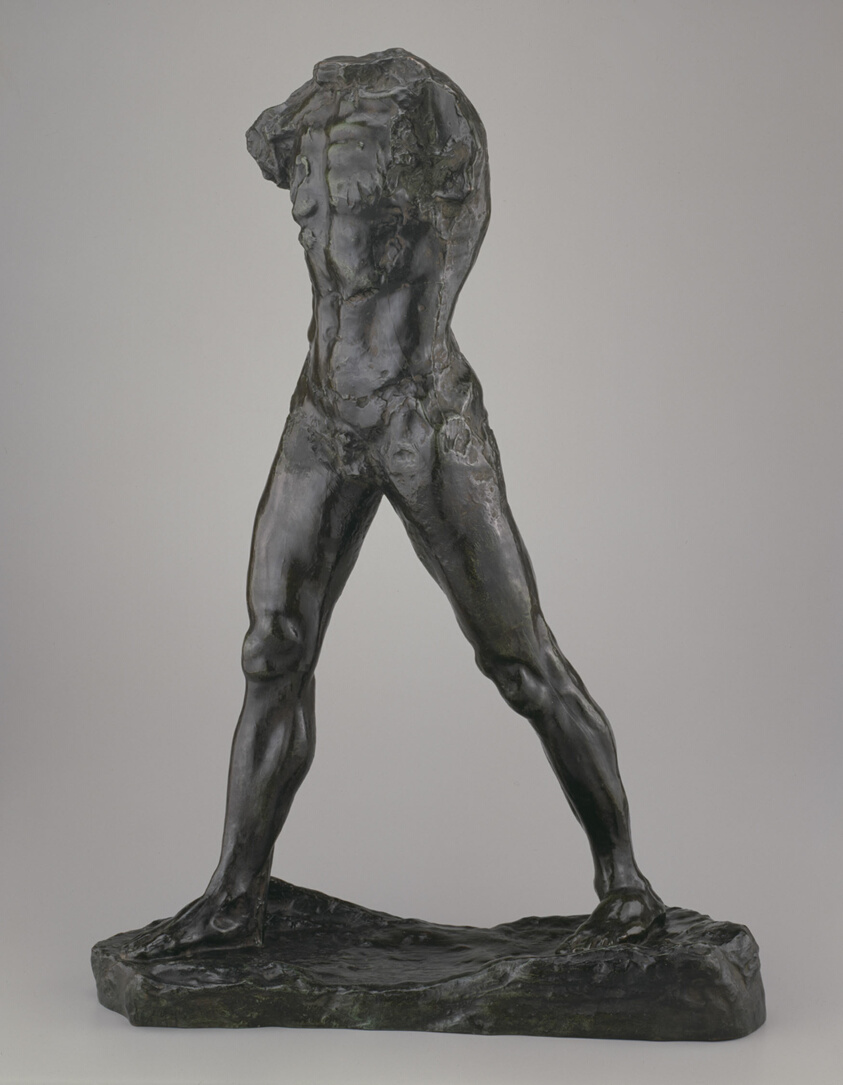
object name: Sculpture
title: The Walking Man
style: Post-Impressionism, 19th century, 20th Century, nineteenth century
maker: Auguste Rodin (French, 1840–1917)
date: Modeled 1877–1900, cast before 1917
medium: Bronze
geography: France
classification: statuette; sculpture; figure; french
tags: men, portraits, figure, man, nudes, walking